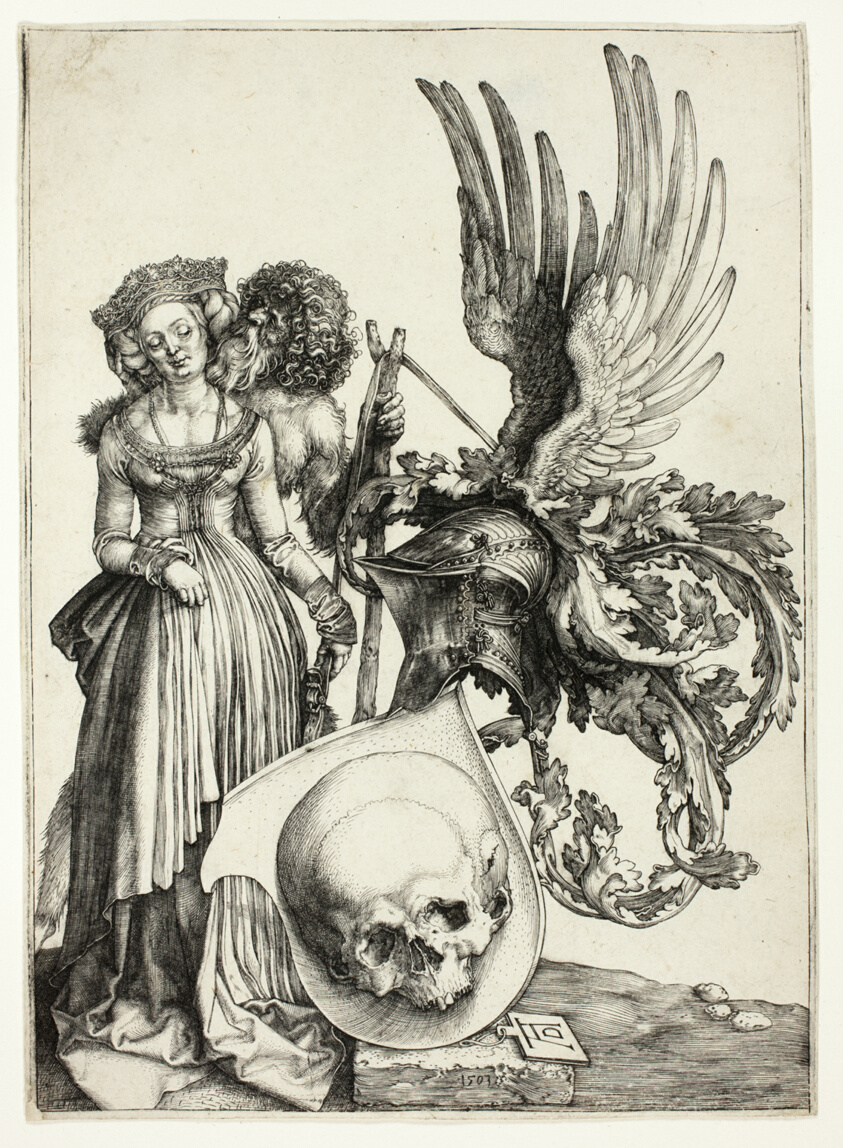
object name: Print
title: Coat of Arms with a Skull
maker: Albrecht Dürer (German, 1471-1528)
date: 1503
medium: Engraving in black on ivory laid paper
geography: Germany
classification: engraving; print; prints and drawing; paper